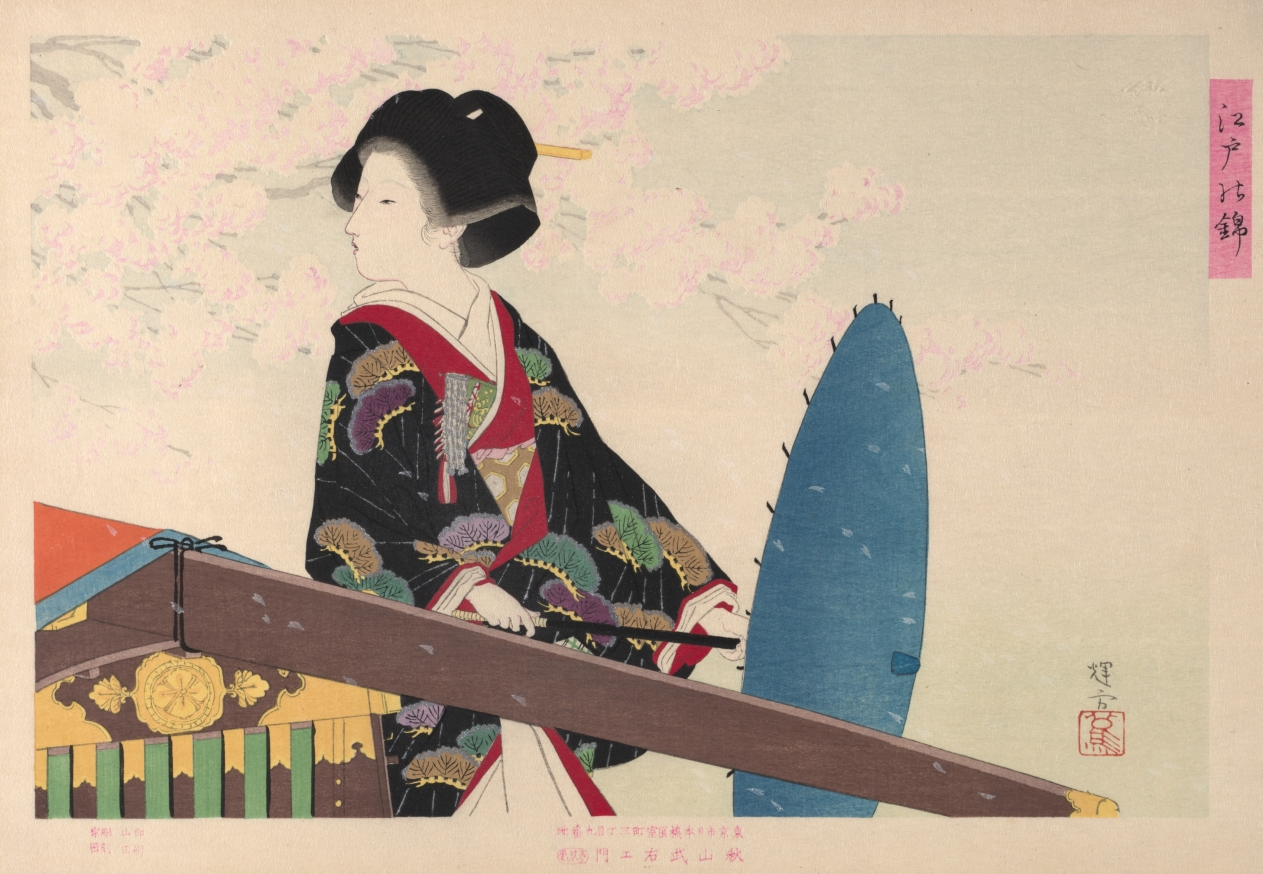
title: Cherry Blossoms, from the series Brocades of Edo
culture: Japan, Meiji period (1868–1912)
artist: Ikeda Terukata (Japanese, 1883–1921)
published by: Akiyama Buemon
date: 1903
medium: Woodblock print, ink and color on paper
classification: Print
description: In this print, a fashionably dressed woman holds out a parasol as she gazes at cherry blossoms. She stands close to her palanquin, which is decorated with elaborate metal fittings. Along with his wife, Ikeda Shoen (1888–1917), Ikeda Terukata trained with print artist Mizuno Toshikata (1866–1908) and focused on designs of beautiful women. He exhibited and won prizes in both the annual Ministry of Education Exhibition (Bunten) and Japan Art Institute Exhibition (Inten).